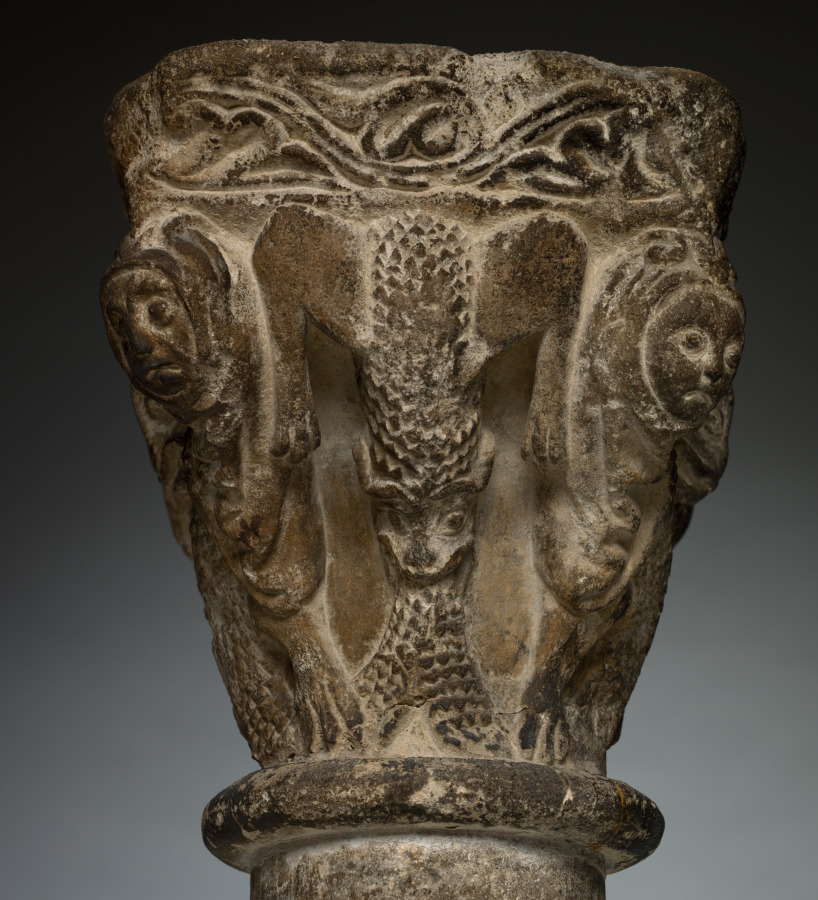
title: Capital with Addorsed Harpies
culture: Southwest France, Languedoc, Toulouse (?), 13th century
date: 1200s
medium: limestone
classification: Sculpture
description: Monstrous images were prevalent in the decoration of religious buildings during the Middle Ages. Such images must have impressed, perhaps even terrified, the monks and visitors who spent much of their time within the cloister or church, a place of prayer, contemplation, and reflection. Scholars have speculated how such images would have been received by the people given the ubiquity of monsters in medieval society. The carved monsters, often symbolizing vice and retribution for sin, were possibly designed to provoke a range of emotional responses including laughter, wonder, surprise, fear, and shock. This striking imagery must have had a strong impact, which in turn led Saint Bernard of Clairvaux (1090–1153), the spiritual head of the Cistercian order, to admonish their use as distracting from prayer.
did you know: A harpy is part bird and part woman featured often in Greek mythology.